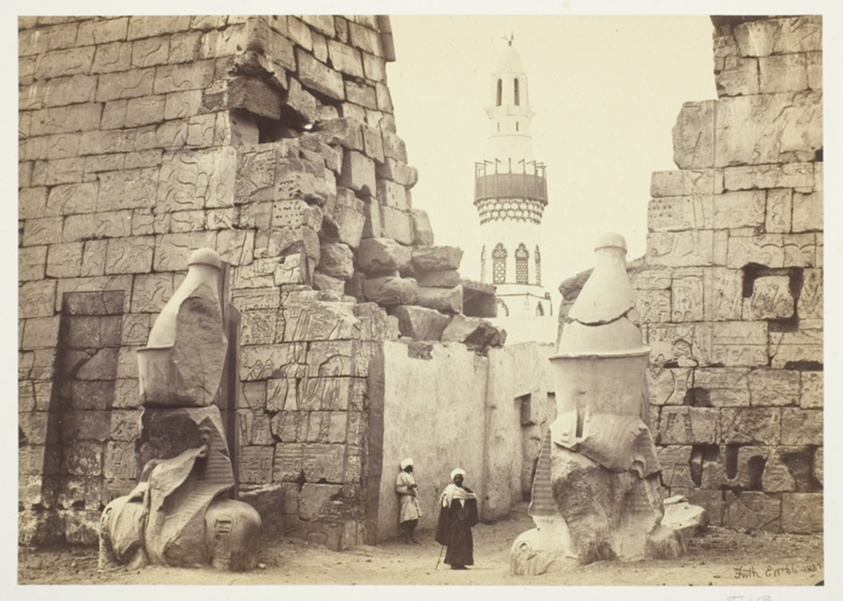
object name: Photograph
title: Entrance to the Great Temple, Luxor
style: 19th century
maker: Francis Frith (English, 1822–1898)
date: 1857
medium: Albumen print, plate 12 from the album "Egypt and Palestine, Volume I," (1858)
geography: Egypt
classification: photograph; albumen silver print; photography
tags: Collected by Hugh Edwards, Egypt and Palestine